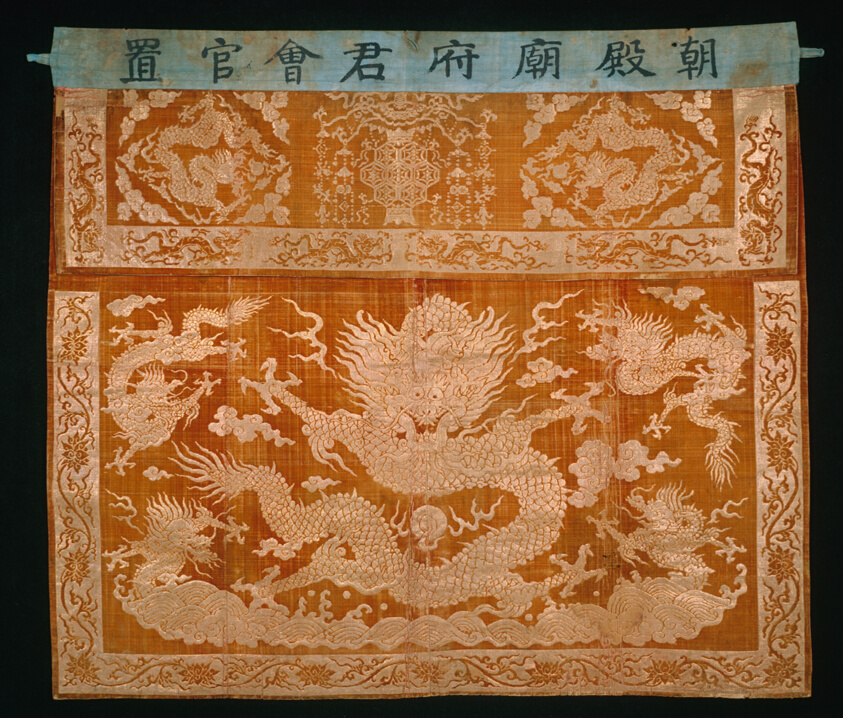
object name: Textile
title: Table Frontal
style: qing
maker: China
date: Qing dynasty (1644–1911), 1804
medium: Silk, warp-float faced 3:1 'Z' twill weave with gold-leaf-over-lacquered-paper strips supplementary facing wefts and supplementary pile warps forming cut voided velvet; top border: cotton, plain weave; painted inscription; lined with cotton, plain weave; painted inscription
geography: China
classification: textile; weaving - velvet